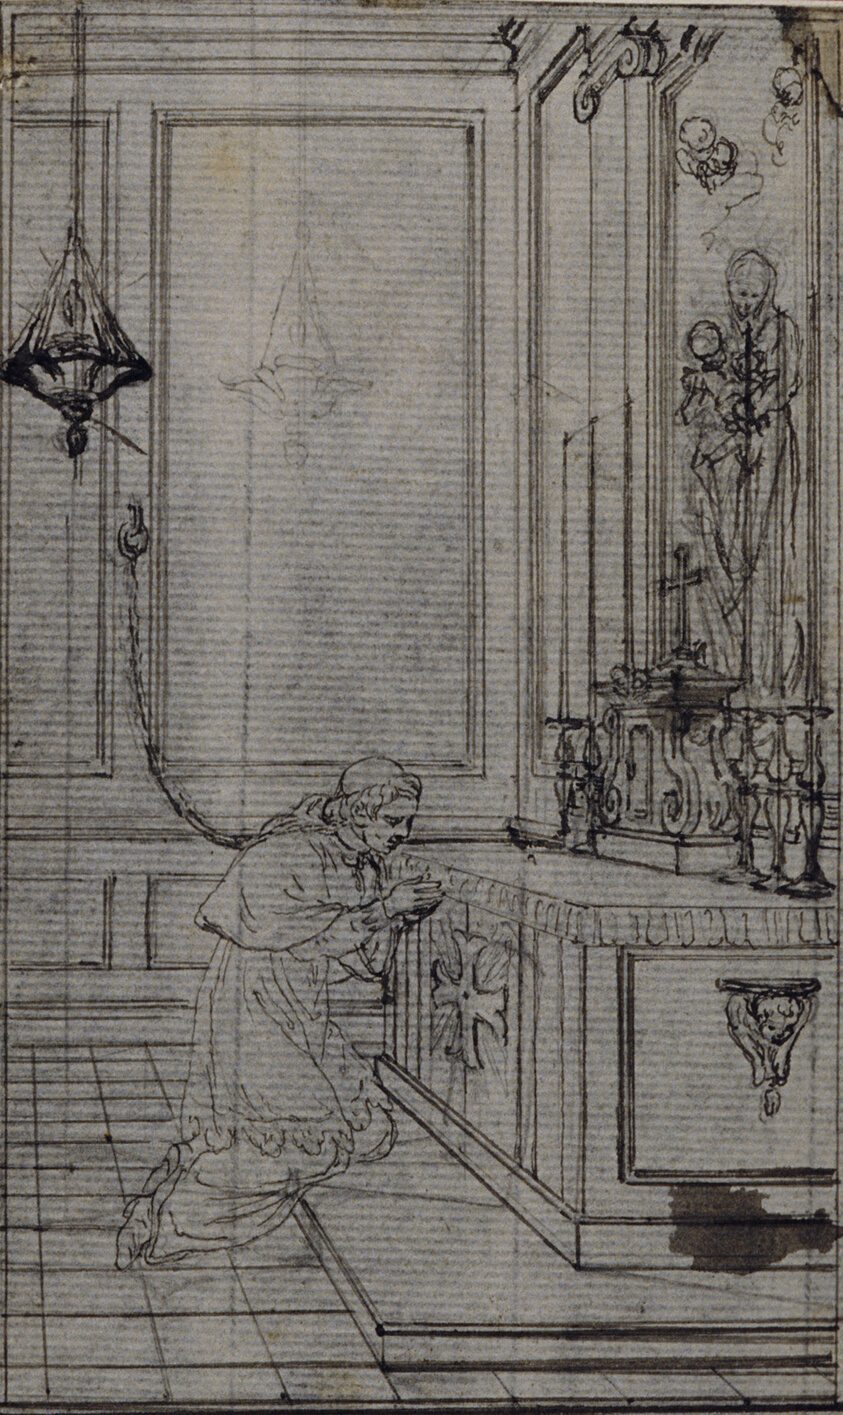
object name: Drawing and Watercolor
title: Study for Vignette in Abbé Dinouart's "Vie du Venerable don Juan de Palafox", p. 256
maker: Hubert François Gravelot (French, 1699-1773)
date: c. 1767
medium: Pen and black ink over graphite, on gray laid paper, laid down on ivory laid paper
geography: France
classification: pen and ink drawings; drawings (visual works); prints and drawing